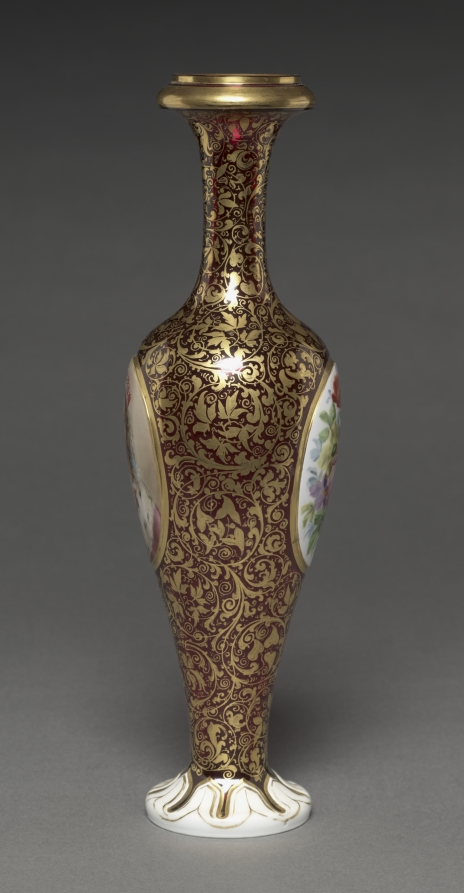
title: Vase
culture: Bohemia (?), 19th century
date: 1840–1860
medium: glass with enamel and gilt decoration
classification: Glass